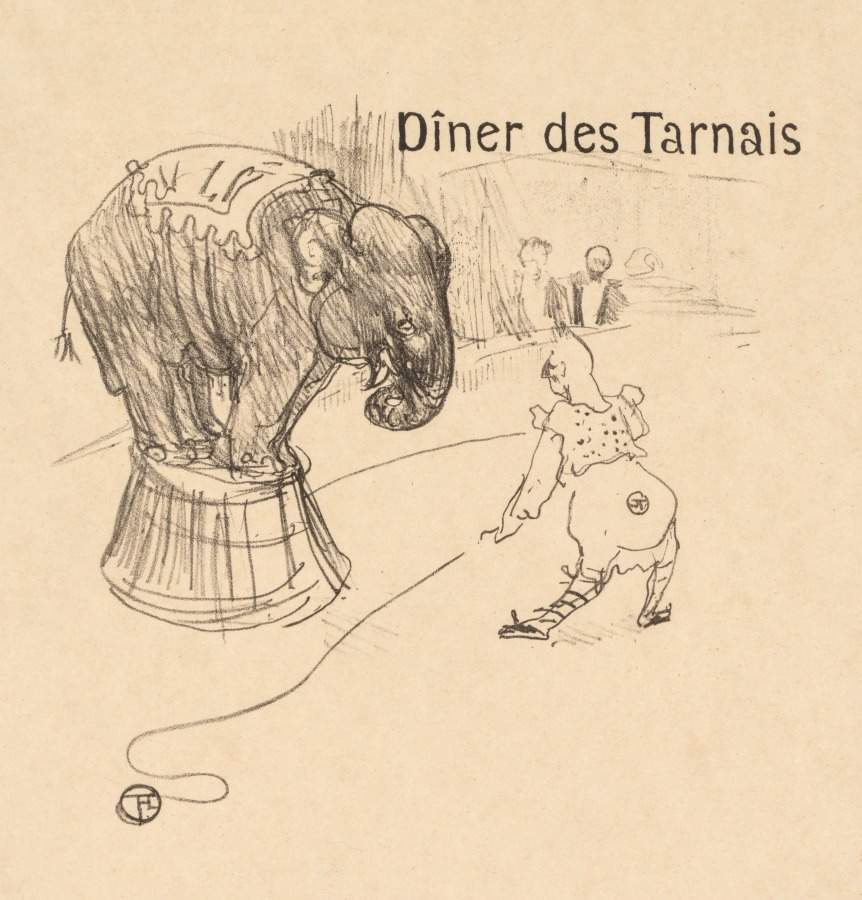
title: Menu from the Dinner Tarnais (Dîner des Tarnais)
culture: France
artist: Henri de Toulouse-Lautrec (French, 1864–1901)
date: 1896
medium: lithograph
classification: Print